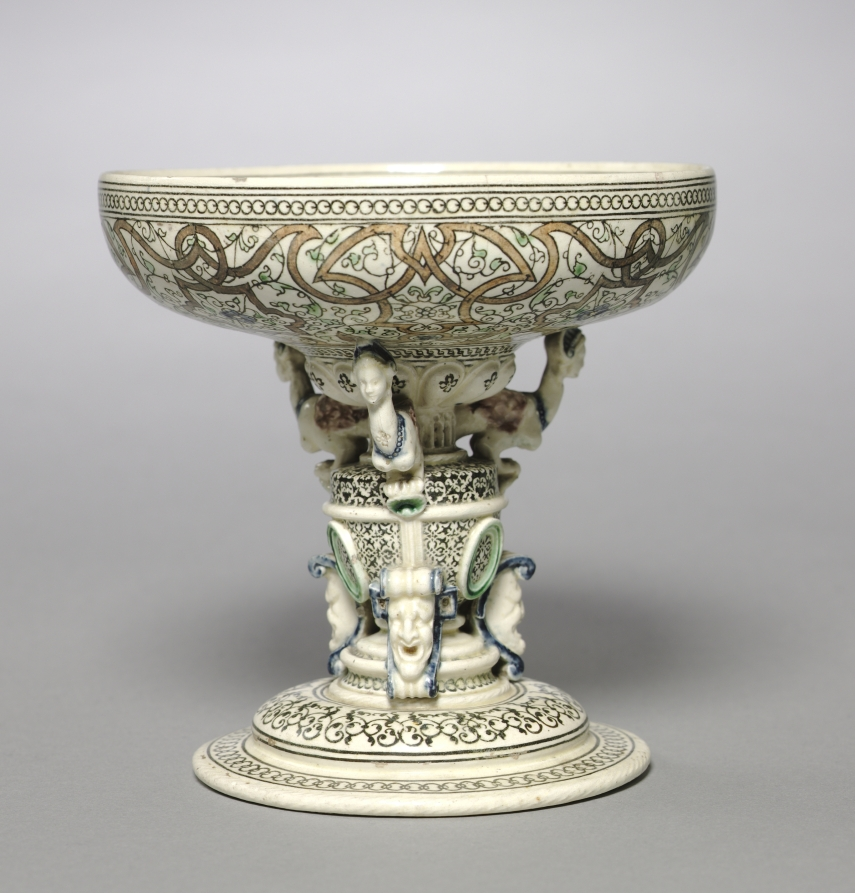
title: Standing Cup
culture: France, 16th century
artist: Saint-Porchaire (French)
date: c. 1540–60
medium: lead-glazed, white-paste earthenware with inlaid slip decoration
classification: Ceramic